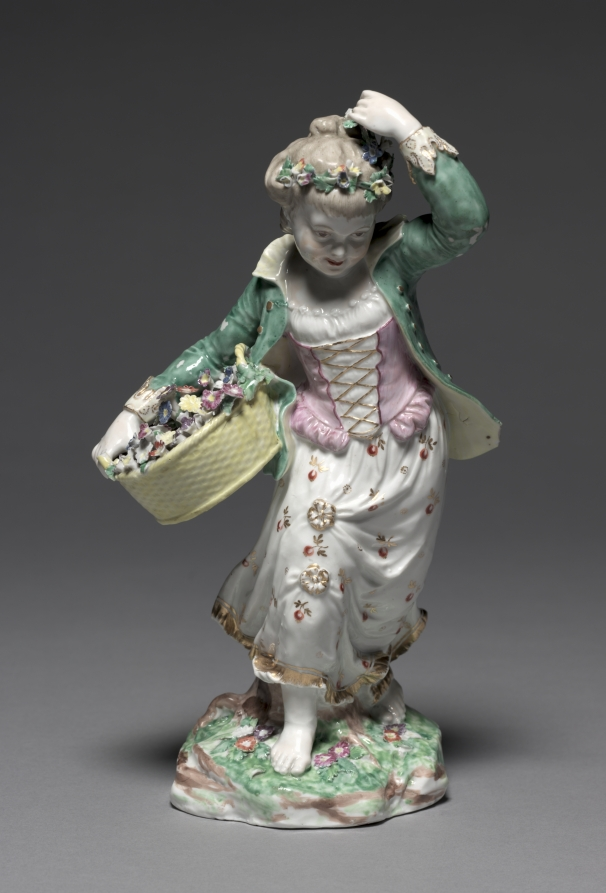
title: Figure of Spring from the Four Seasons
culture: England, Bristol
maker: Bristol Porcelain Factory (British, 1770–81)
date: c. 1775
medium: hard-paste porcelain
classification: Ceramic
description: The modern notion of childhood as a time of innocence and simplicity emerged during the second half of the eighteenth century. This understanding of adolescence led to numerous depictions of children as personifications of the four seasons. Here spring is portrayed as a young girl adorning her hair with flowers. The flowers filling her basket and growing in the grass around her signal spring’s arrival.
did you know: Allegorical figures most often decorated a table during the dessert course, providing amusing subjects for conversation.